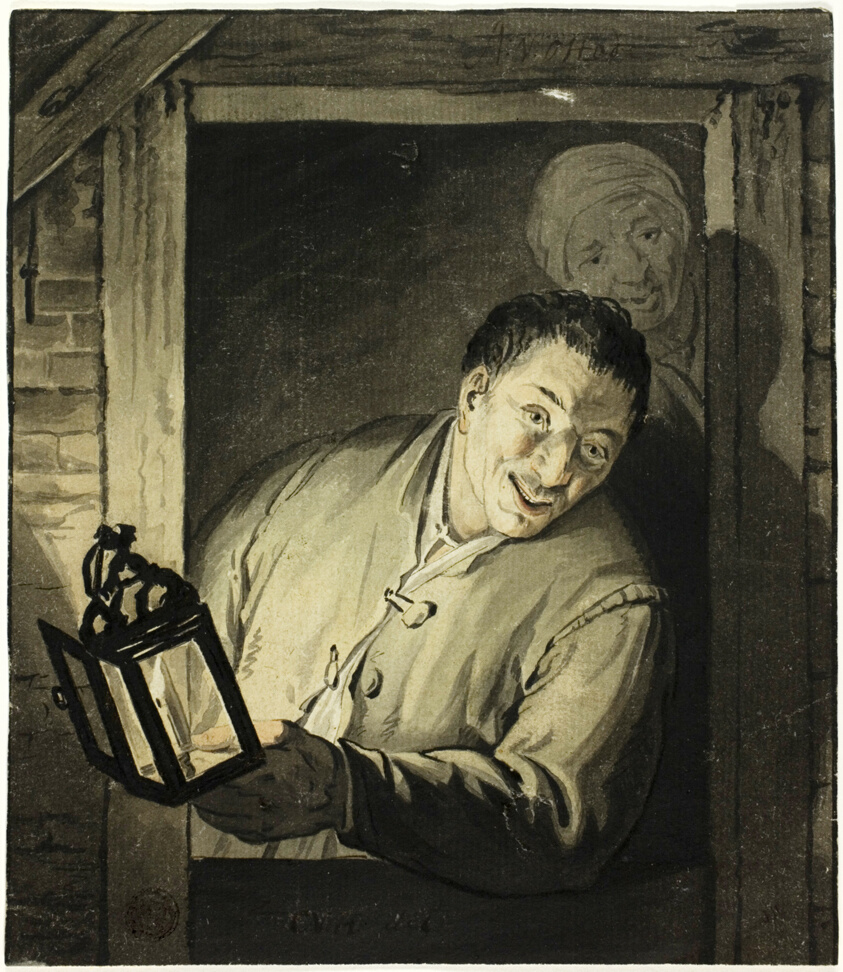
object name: Drawing and Watercolor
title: Man with Lantern in Doorway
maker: After Adriaen van Ostade; Dutch, 1610-1685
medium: Watercolor on ivory laid paper, partially laid down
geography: Holland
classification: watercolor; drawings (visual works); prints and drawing